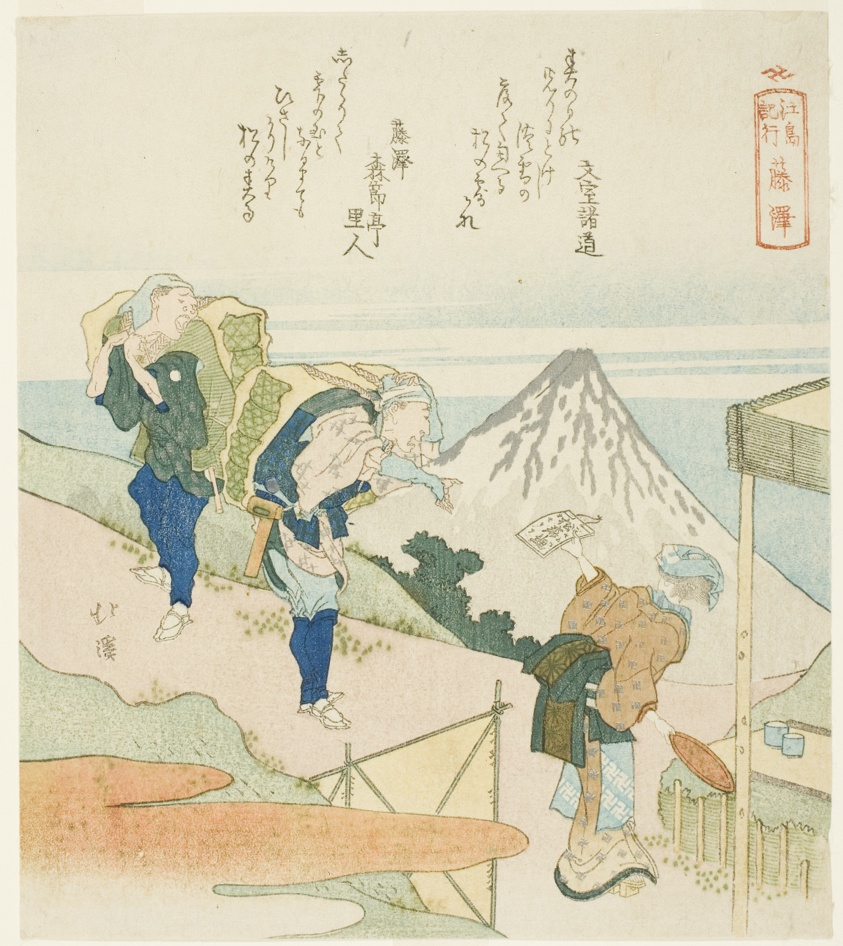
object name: Print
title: Fujisawa, from the series "A Record of a Journey to Enoshima (Enoshima kiko)"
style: Japanese (culture or style)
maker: Totoya Hokkei (Japanese, 1780-1850)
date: 1833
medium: Color woodblock print; shikishiban, surimono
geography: Japan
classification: woodblock print; print; asian art